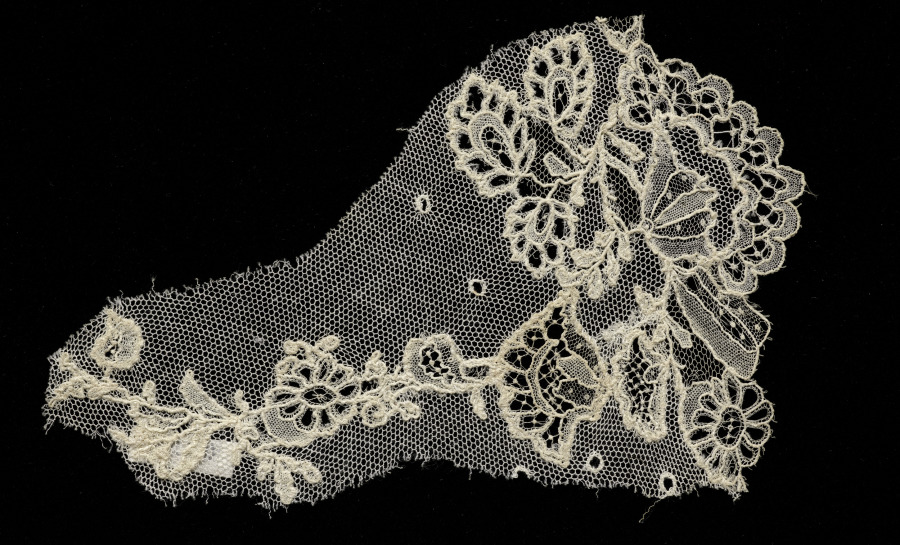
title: Lace Fragment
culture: Spain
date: 1800s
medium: Bobbin lace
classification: Lace